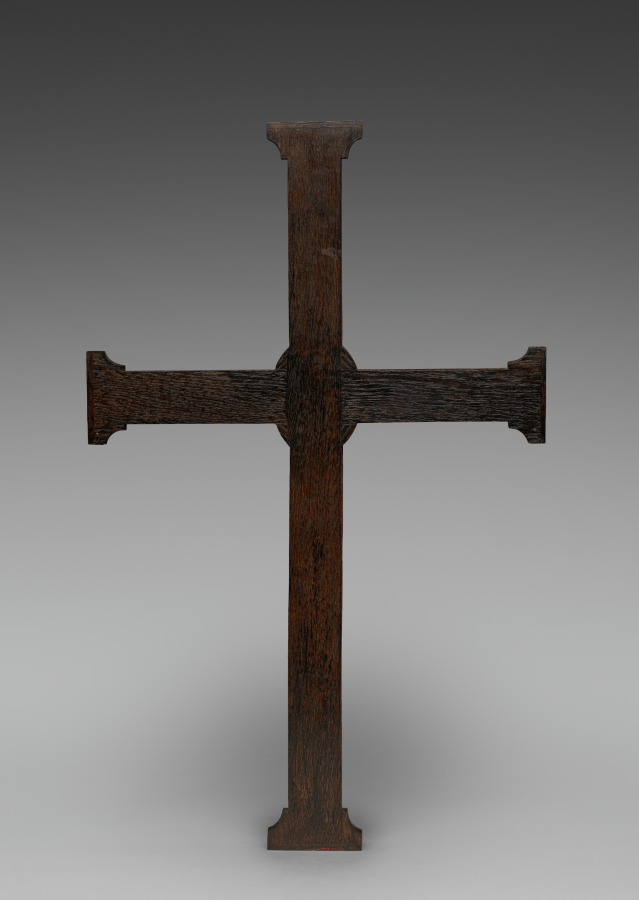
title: The "Spitzer Cross"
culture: France, Limoges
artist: Master of the Royal Plantagenet Workshop (French)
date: c. 1190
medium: copper: gilded, engraved, stippled; champlevé enamel; wood backing (modern)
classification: Enamel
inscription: inscription on titulus: IHS XPS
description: This fine enameled cross is named the "Spitzer Cross" after the Viennese art dealer and collector Baron Frédéric Spitzer, who owned it in the 19th century. It has justly been hailed as the finest Limoges enameled cross to survive. The work’s coloration exemplifies its refined craftsmanship. Rendered in white enamel, with fine lines defining the rib cage, abdomen, and muscles, Christ’s body contrasts strikingly with the vibrant green, blue, and yellow of his halo, loincloth, and the cross.